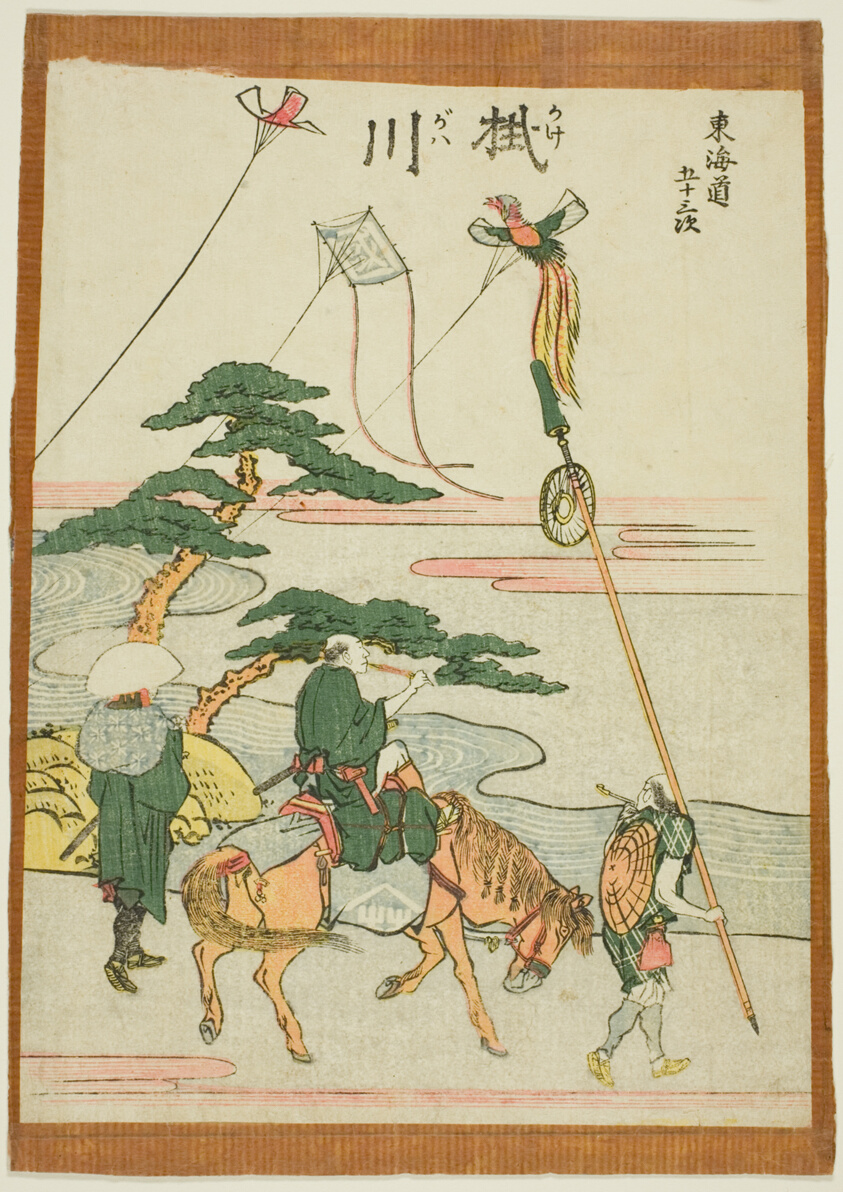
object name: Print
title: Kakegawa, from the series "Fifty-three Stations of the Tokaido (Tokaido gojusan tsugi)"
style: Japanese (culture or style)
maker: Katsushika Hokusai 葛飾 北斎; Japanese, 1760-1849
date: c. 1806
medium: Color woodblock print; chuban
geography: Japan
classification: woodblock print; print; asian art